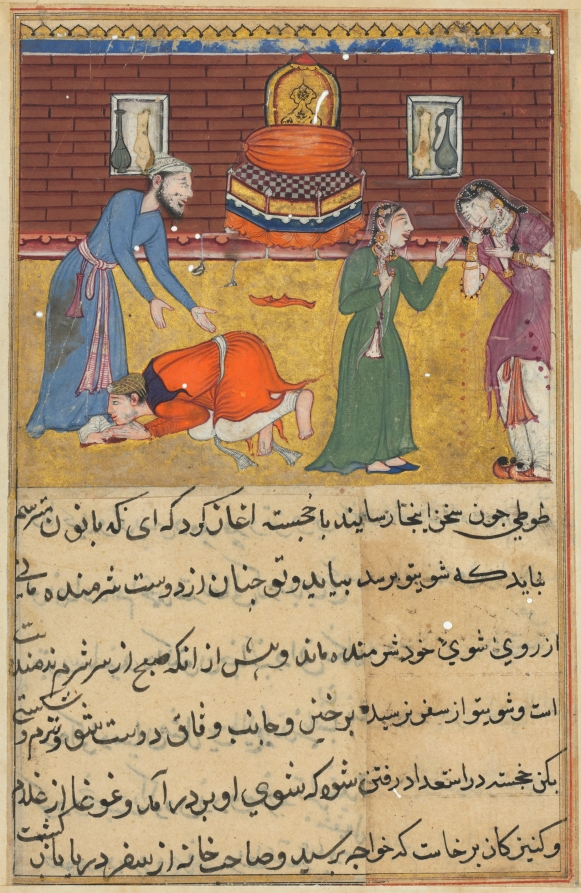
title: The pious man’s son, now a king, reveals himself to his father; his nurse upbraids his unfaithful mother, from a Tuti-nama (Tales of a Parrot): Fifty-second Night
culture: Mughal India, court of Akbar (reigned 1556–1605)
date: c. 1560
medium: gum tempera, ink, and gold on paper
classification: Painting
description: The young man throws himself at his overjoyed father’s feet. As a boy, he was nearly killed by his treacherous mother, who hoped to please her lover. The nurse, learning of her plan, took the child and fled to safety. In the intervening years, he killed a dragon, married a princess, and became a king. The king’s success is attributed to a magical, seven-colored bird’s head, which he ate as a child.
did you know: A corrosive pigment used on two of the vessels in the back wall has eaten through the paper.